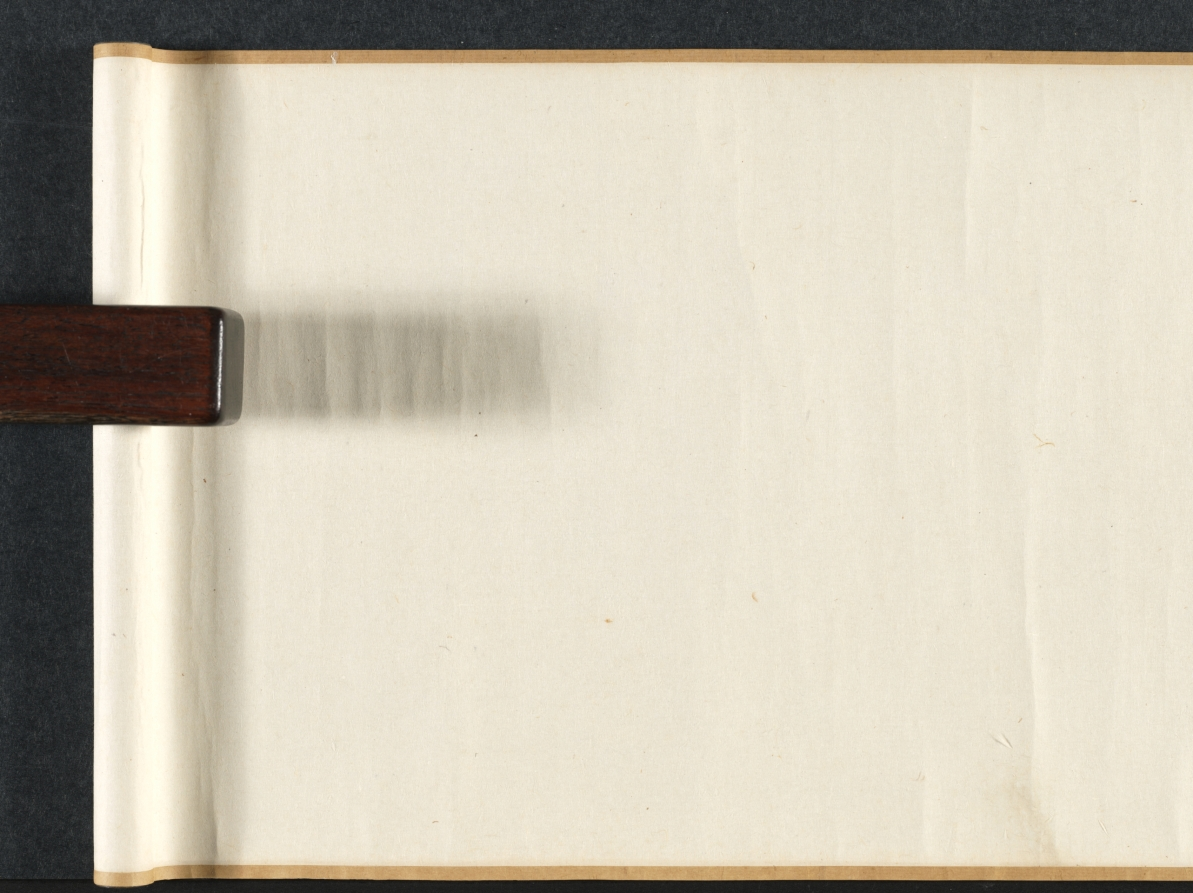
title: Zhao Mengfu Writing the Heart (Hridaya) Sutra in Exchange for Tea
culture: China, Ming dynasty (1368–1644)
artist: Qiu Ying (Chinese, 1494–1552)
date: 1542–43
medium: handscroll, ink and light color on paper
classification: Painting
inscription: Inscription accompanying text of "Heart" sutra, by Wen Zhengming 文徵明 (1470-1559): Zhengming 徵明, written in a boat at Kunshan 崑山, on the twenty-first day of the ninth month, in the renyin 壬寅 year, the twenty-first year of the Jiajing era [1542].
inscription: Colophon by Wang Shih-mou: Chou Yü-shün [Feng-lai] of K'un-shan was a scholarly, refined connoisseur of antiquities. He had acquired the poem written by Chao Ch'eng-chih [Chao Meng-fu] about the exchage of tea for Chao's calligraphy of the Prajna sutra. But the sutra itself, also written by Chao Meng-fu, is lost. He therefore asked Ch'iu Shih-fu [Ch'iu Ying] to do a painting and had Wen Cheng-ming, the artist-in-attendance, write the Hridaya Sutra in the "small, regular" style for replacement. Both works are so excellent that even Chao Meng-fu himself would certainly applaud if he should be reborn to see them. I, Shih-mou, had gotten possession of this scroll from the family of Chou Yü-shün, and since it was so wonderfully matched with one of the treasures in my collection. the Hridaya Sutra written by Chao Meng-fu for Priest Li in "running script," like the reuniting of two halves of a jade pi, I completed the scroll with the several colophons written for the "tea-exchange" poem. I did this because the painting of Ch'iu Ying and the calligraphy of Wen Cheng-ming are definitely masterpieces by themselves with absolutely no need to depend on any of the colophons written for the Chao Meng-fu poem. Furthermore, the two sons of Wen Cheng-ming, Shou-ch'eng [Wen P'eng] and Hsiu-ch'eng [Wen Chia]. have each written a colophon explaining the reason for replacing the calligraphy. As their writings are both acceptable for high standard, I didn't want to throw them away. [So by separating these into two scrolls] I was able to get two complete works of art in one clever stroke. I was quite pleased with myself, and hope that those who see this scroll shall not get suspicious because of the missing colophons. Wang Shih-mou wrote in his Jih-sun-chai study, on the first day of the tenth month, in the chia-shen year of the Wan-li era [1584].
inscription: Colophon by Wen P'eng: I-shao [Wang Hsi-chi] wrote in exchange for a flock of geese. Su Tung-po wrote in exchange for meat. Both episodes have become legends of a thousand years. Sung-hsüeh [Chao Meng-fu] "teased" Priest Kung for tea, and the story was immediately immortalized in the poems by all the famous scholars of the times. Indeed, how could one say his humor and elegance are not equal to the ancient worthies? Unfortunately, the poetry has survived but the writing of the sutra is lost. Yü-shün [Chou Feng-lai] therefore asked my father to make up the writing and so here is the complete work of art. Respectfully inscribed by Wen P'eng in the mid-summer of 1543.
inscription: Colophon by Wen Chia: Sung-hsüeh [Chao Meng-fu], in exchanging tea leaves for his writing of the Prajna, had put himself in the company of Yu-chün [Wang Hsi-chih] who exchanged geese for his writing of the Huang-t'ing sutra [the Yellow Chamber, or the Wai-ching ching, a Taoist text attributed to the Yellow Emperor]. However, was this romantic and cultivated gesture really intended for such small things? Actually, he was only proud that the excellence of his calligraphy had made him worthy to be the successor of the Ch'in Dynasty master. Since, very unfortunately, Chao Meng-fu's writing [of the Prajna] was already lost, my father therefore agreed to replace it, and did the calligraphy in the style of the Yellow Chamber. In addition, Yu-shün [Chou Feng-lai] had asked Mr. Ch'iu Shih-fu [Ch'iu Ying] to do a painting of the sutra writing story in the style of Li Lung-mien at the head of the scroll. Now it would seem the entire episode should go down in history for immortality. Respectfully recorded by Wen Chia, on the eighth day of the eighth month, in the year of k'uei-mao [1543]. trans. WKH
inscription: 4 colophons and 23 seals: 1 colophon, dated 1543, and 2 seals of Wen Peng (1498-1573); 1 colophon, dated 1543, and 2 seals of Wen Chia (1501-1583); 1 colophon, dated 1584, and 3 seals of Wang Shih-mou (1536-1588); 2 seals of Chou Feng-lai (16th c.); 3 seals of Sung Lo (1634-1713); 5 seals of the Ch'ien-lung emperor (r. 1736-95); 1 colophon, dated 1902, and 1 seal of Fei Nien-tz'u (1885-1905); 4 seals of Wan-go H. C. Weng (b. 1918); 1 seal unidentified.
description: The Yuan dynasty calligrapher Zhao Mengfu (1254–1322) is said to have transcribed the Heart Sutra for a certain priest named Li in exchange for tea. Later, during the Ming dynasty, the professional painter Qiu Ying from Suzhou painted this scene for his patron. Here, Zhao Mengfu holds a brush and has a piece of paper laid out before him. On the table is an ink stone, an ink stick, and a small water dropper. Drops of water would dissolve the ink stick into liquid ink when it was ground on the flat square stone.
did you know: Qiu Ying was born to a peasant family, but his natural talent led him to a successful career as a professional painter with wealthy patrons.